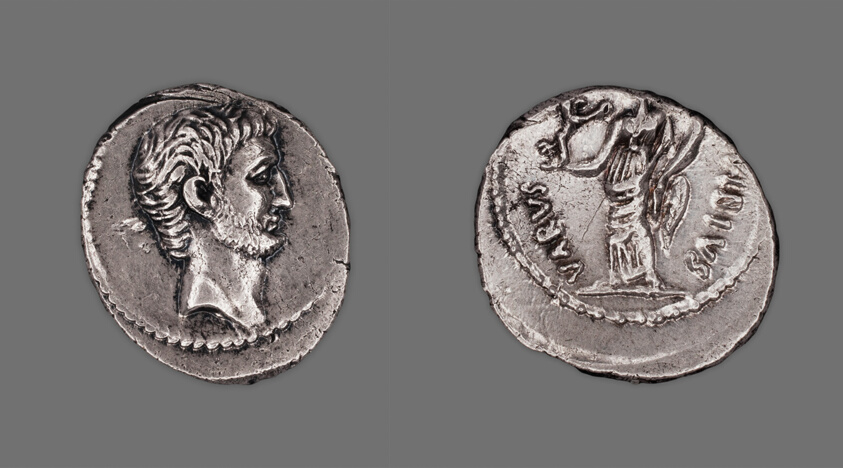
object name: Coin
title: Denarius (Coin) Portraying Mark Antony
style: republic period, roman (ancient, style or period)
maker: Roman; minted in Rome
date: 42 BCE, issued by C. Vibius Varus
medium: Silver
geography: Rome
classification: coin; ancient art